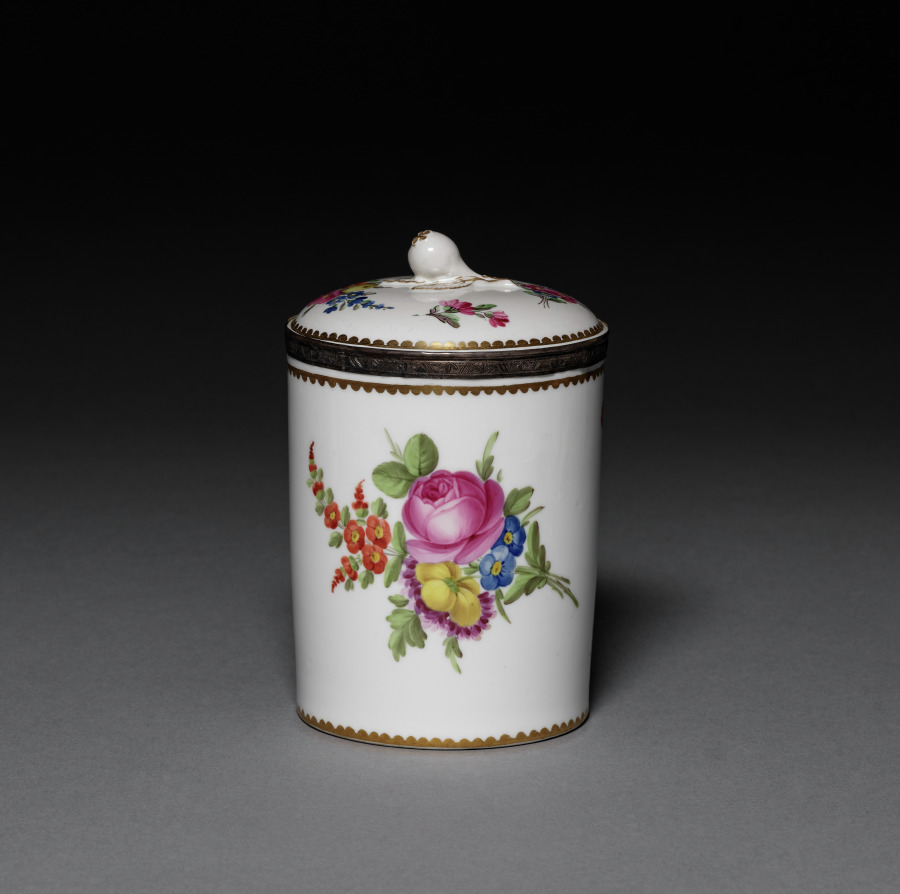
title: Covered Jar (Pot de tabac)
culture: France, 18th century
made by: Faubourg Saint-Denis (French)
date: c. 1779–1789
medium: Hard-paste porcelain with enamel and gilt decoration; metal mount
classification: Ceramic